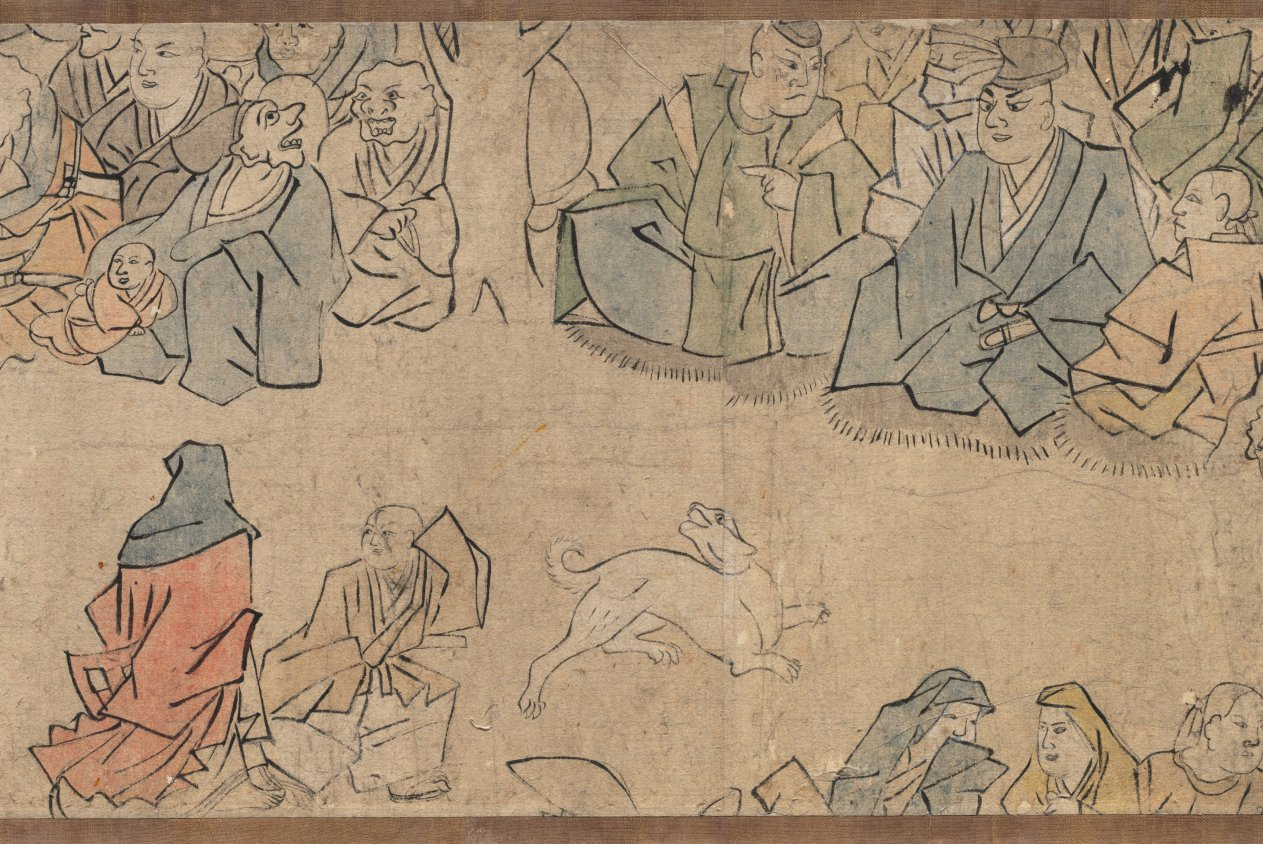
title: Oeyama Engi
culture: Japan, Edo period (1615–1868)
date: 1615–1868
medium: one of a pair of handscrolls; ink and color on paper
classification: Painting